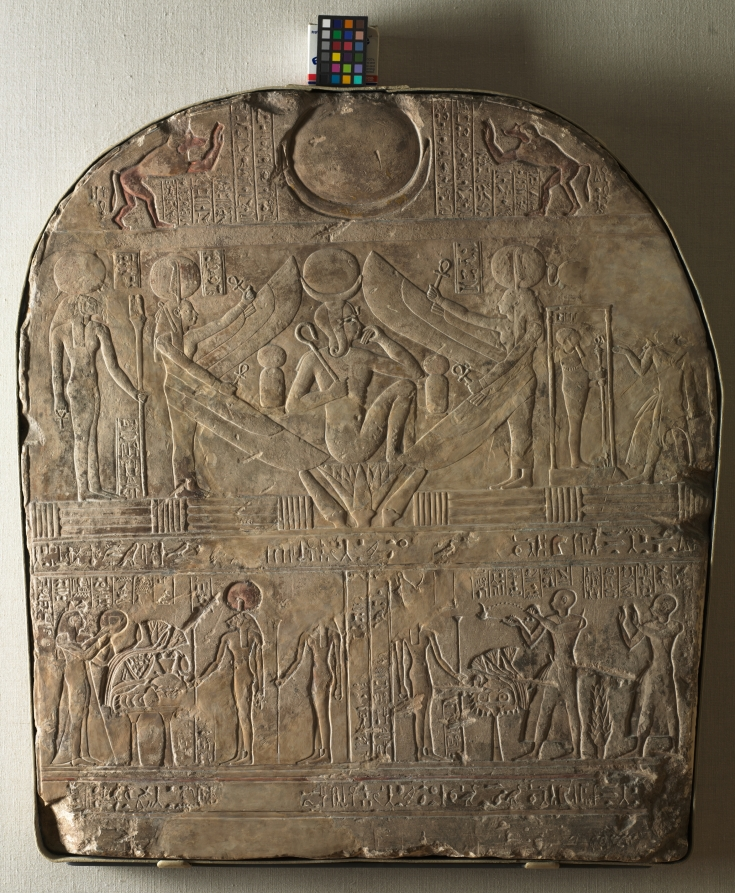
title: Stele of the High Priest of Ptah, Shedsunefertem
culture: Egypt, Third Intermediate (1069–715 BCE), Dynasty 22, reign of Shosheng I (943–922 BCE)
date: 945–924 BCE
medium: limestone, originally painted and gilded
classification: Sculpture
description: This stele of Shedsunefertem, the High Priest of Ptah, is rich in religious symbolism. In the center of the top register is a disk and crescent, originally gilded. At either side a baboon raises its arms in adoration. The Egyptians believed that the jabbering of the baboons at dawn was a hymn of praise to the sun god Ra in a secret language only the king understood. It begins, "Praising Ra when he shines on the horizon." Directly below in the middle register a child god is seated on a lotus flower. In Egyptian mythology the sun arose out of the primeval waters at the dawn of creation in a lotus flower. Winged figures of Maat, goddess of Truth, stand protectively at either side. The damaged figure of the high priest himself, wearing the panther skin and jackal-collar of his office, appears at the far right, worshipping the god Ptah, whose consort, the lioness-headed goddess Sekhmet, appears on the far left. The figures in the bottom register are colleagues who appear here as dependents under the powerful high priest's protection.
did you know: The eye and eyebrow of the young sun-god Ra (at center) were once inlaid.